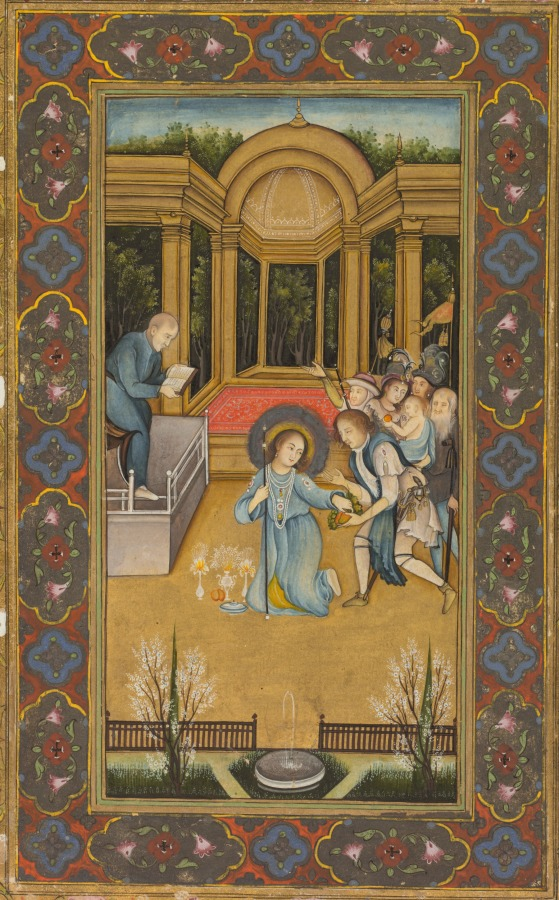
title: Jesus among the doctors in the Temple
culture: India, Lucknow, Mughal, 18th century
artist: Mir Kalan Khan (Indian, c. 1730–1775)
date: c. 1760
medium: Gum tempera and gold on paper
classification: Painting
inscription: Persian inscription on verso: an image of Blessed Miriam, work of Mir Kalan Khan